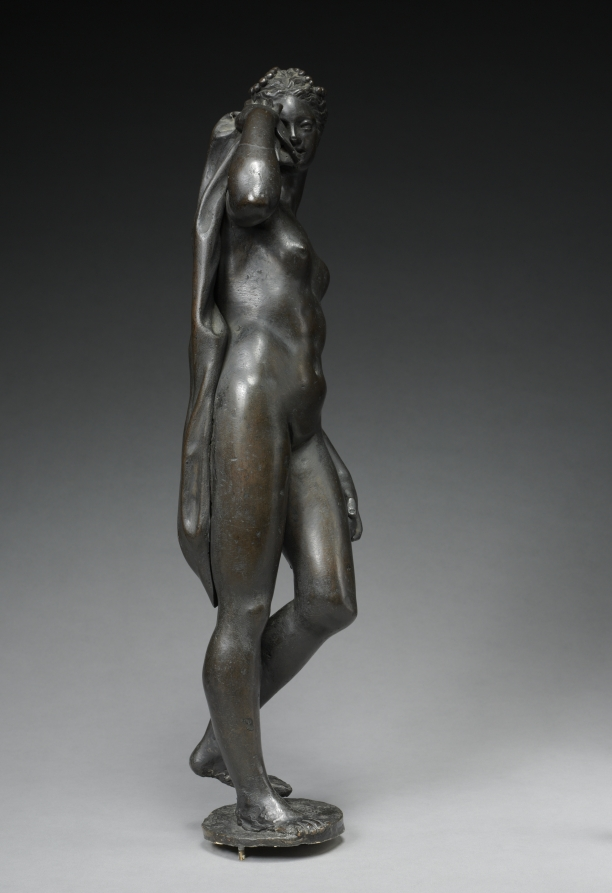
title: Venus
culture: Italy, 16th century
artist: Danese Cattaneo (Italian, 1509–1573)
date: c. 1560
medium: bronze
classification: Sculpture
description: Cattaneo's Venus is reminiscent of the ancient Aphrodite of Knidos by Praxiteles (Greek, c. 375–340 BC), as Venus holds her drapery in her right hand, leaving her body fully exposed. This work recalls Cattaneo's bronze sculptures of goddesses with the unbalanced curvature of the body and elaborately sculpted hair. Along with the hands and feet, the back of the figure is largely unfinished, indicating that it probably originally stood against a wall or in a niche.